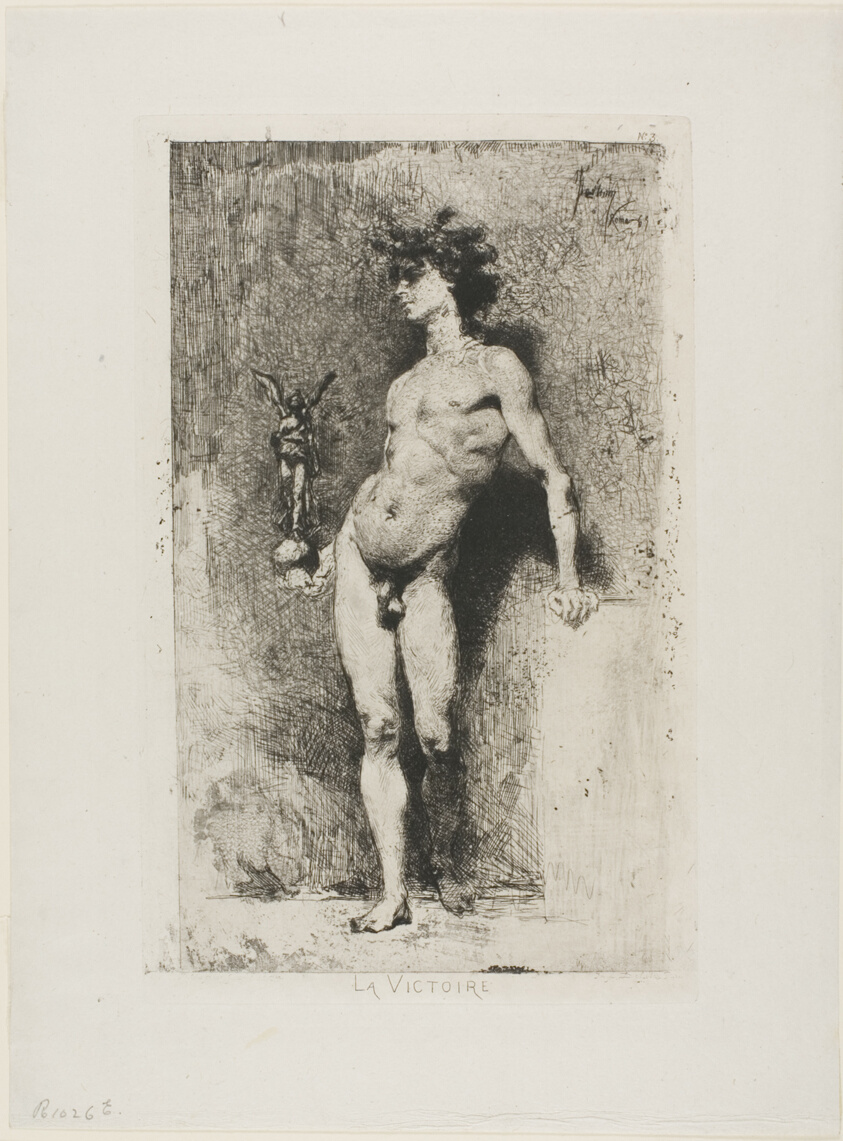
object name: Print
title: Victory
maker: Mariano José María Bernardo Fortuny y Carbó; Spanish, 1838-1874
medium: Etching on paper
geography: Spain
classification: etching; print; prints and drawing